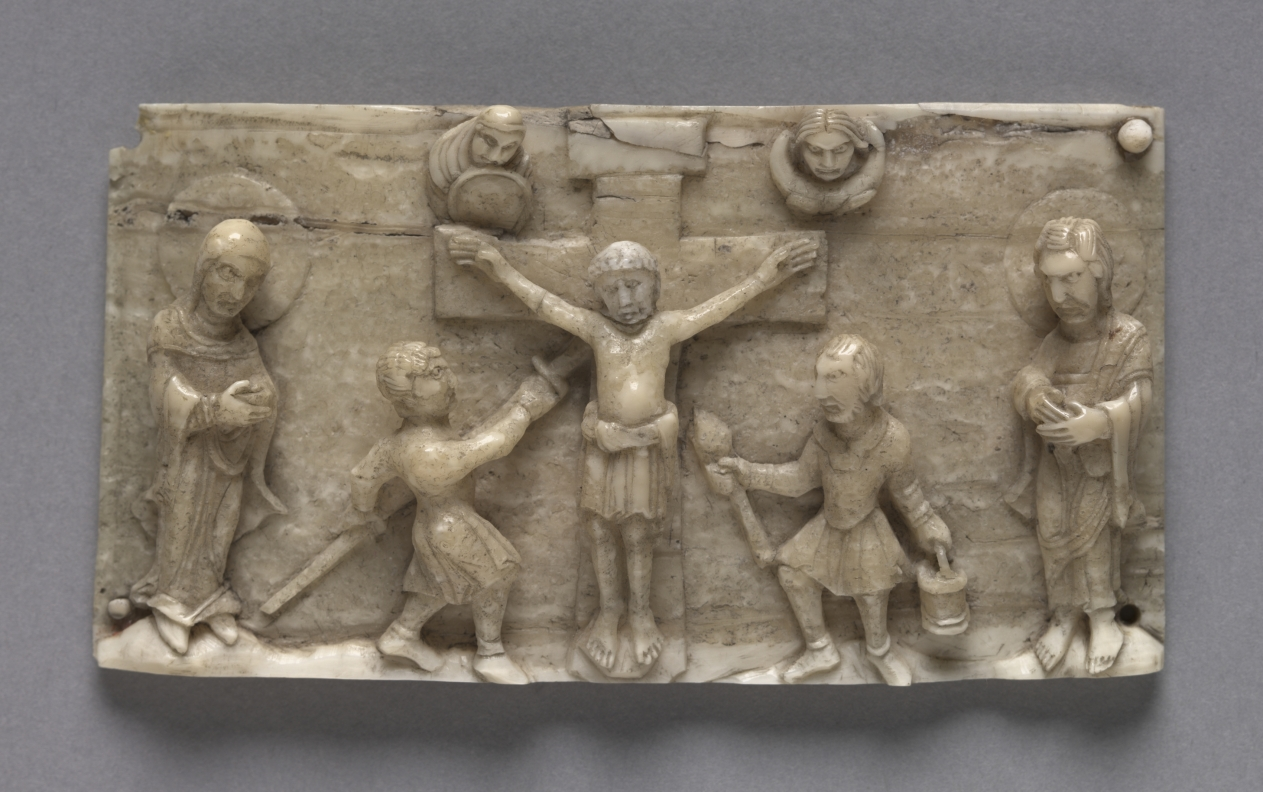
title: Plaque from a Portable Altar Showing the Crucifixion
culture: Germany, Lower Rhine Valley, Romanesque period, 11th century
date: 1050–1100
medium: walrus ivory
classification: Ivory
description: These intricately carved ivory panels once decorated the sides of a portable altar. Three of the plaques, those depicting Christ in Majesty and his apostles, were the first major acquisition of William M. Milliken, the museum's first curator of decorative arts and later director (1930–58). They were purchased from Emile Rey, the New York partner of Arnold Seligmann, Rey and Company, who had been closely associated with J. P. Morgan, Henry Walters, and other important American collectors. The fourth plaque, depicting the Crucifixion, was donated by Arnold Seligmann, Rey and Company later the same year. As Milliken later recalled, the pieces Rey showed him "were immensely intriguing, monumental in scale, even if tiny in size, the Christ in the Mandorla could have been enlarged and would have graced the tympanum of a great cathedral. . . . These morse [that is, walrus] ivories overwhelmed me . . . Somehow they must come to Cleveland. How was the question. Yet they would and must."